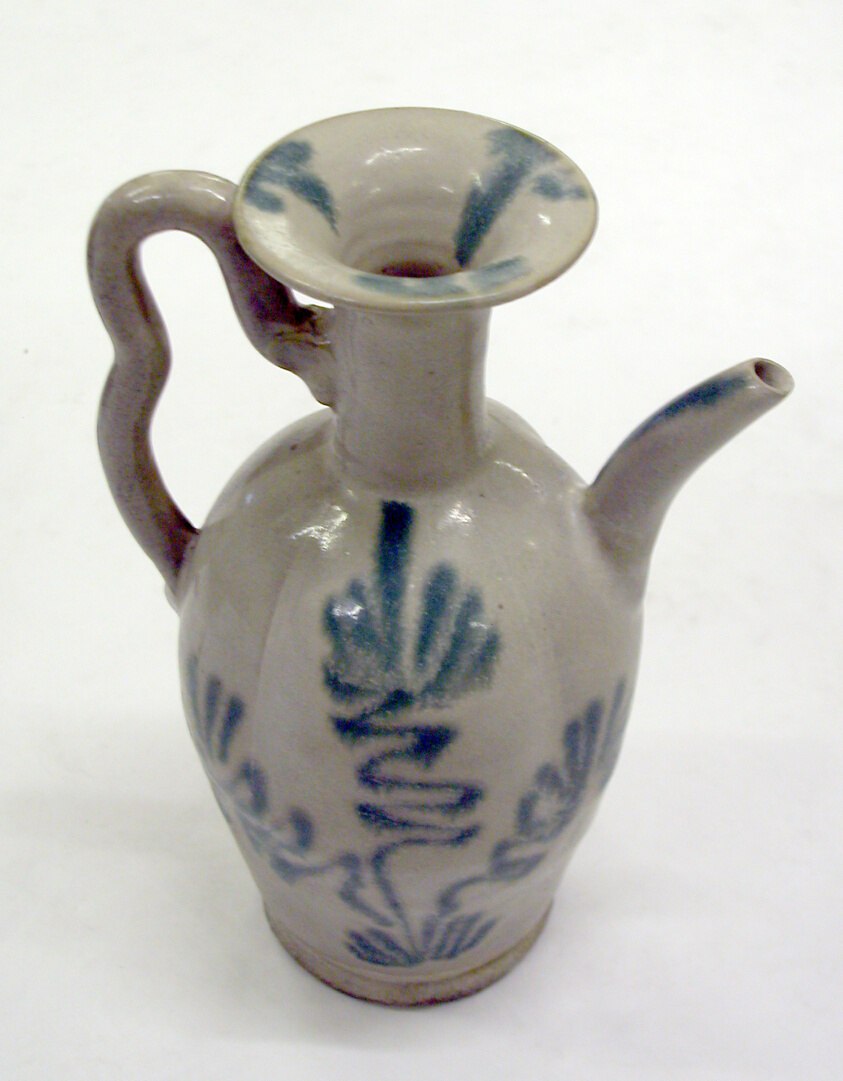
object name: Decorative Arts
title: Ewer with Abstract Swirls and Radiating Strokes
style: Chinese (culture or style)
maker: China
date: Tang dynasty (618–907), 9th century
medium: Tongguan (Changsha) ware; stoneware with underglaze painting in copper green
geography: China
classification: ewer (vessel); vessel; stoneware; ceramics; asian art; decorative arts